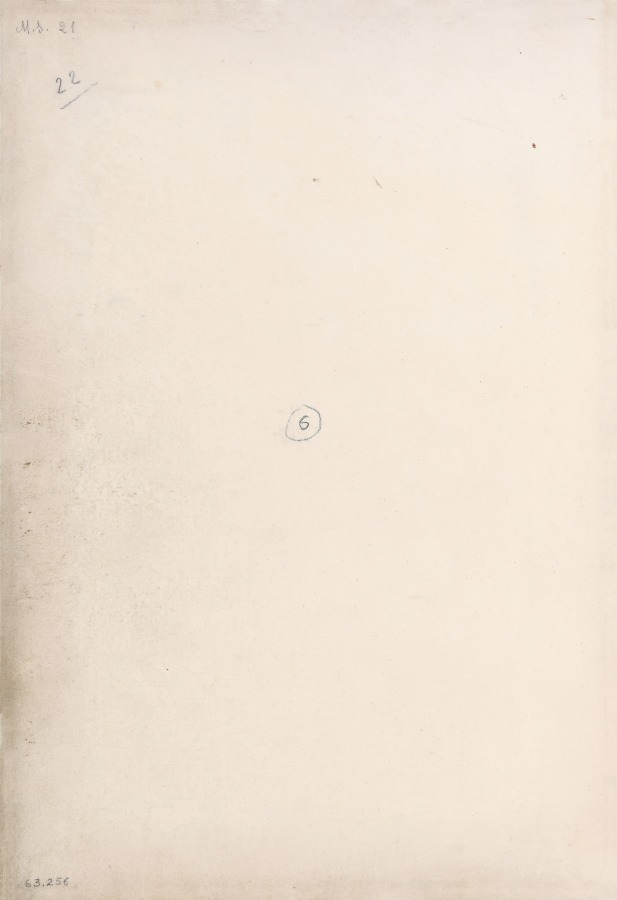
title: Hours of Queen Isabella the Catholic, Queen of Spain: Fol. 1r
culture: Flanders, Ghent and Bruges, late 15th century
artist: Master of the First Prayerbook of Maximillian (Flemish, c. 1444–1519)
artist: and Associates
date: c. 1500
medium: ink, tempera, and gold on vellum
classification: Bound Volume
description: This manuscript was illuminated by a circle of at least five highly organized manuscript painters active in the Flemish cities of Ghent and Bruges. The principal illuminator was Alexander Bening, who painted the majority of the book's miniatures. Manuscripts produced by this circle of artists are renowned for the decoration of their borders, which typically feature a rich variety of realistically painted flowers, birds, and butterflies. This prayer book, called a book of hours, was intended not for a cleric but for the private devotions of a lay person—in this case, Isabella the Catholic, Queen of Spain (1451–1504); her coat of arms embellishes the book's frontispiece. It is unlikely that the book was commissioned by the Queen herself; rather, she probably received it as a diplomatic gift from someone courting her patronage, perhaps Cardinal Francisco Jimenez de Cisneros. A Franciscan friar, Jimenez was dependent upon Isabella for his advancement, first to the post of Queen's confessor in 1492, and then to Archbishop of Toledo in 1495.